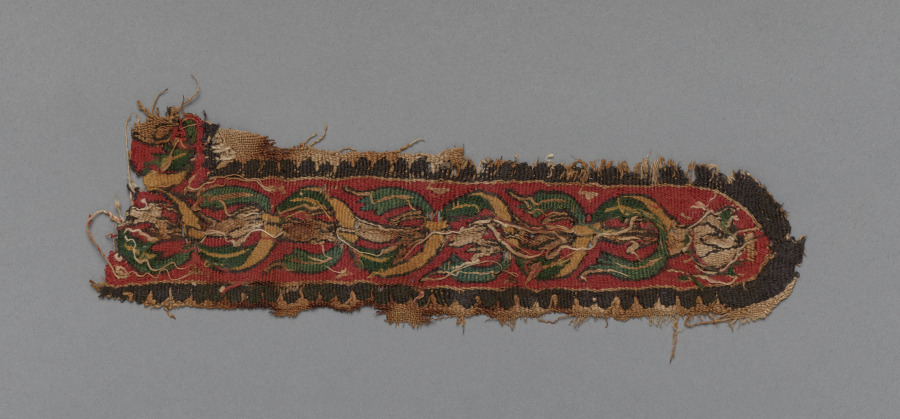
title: Fragment from a Tunic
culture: Egypt, 6th - 16th century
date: 500s - 1500s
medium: tabby weave with inwoven tapestry ornament, linen and wool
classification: Textile